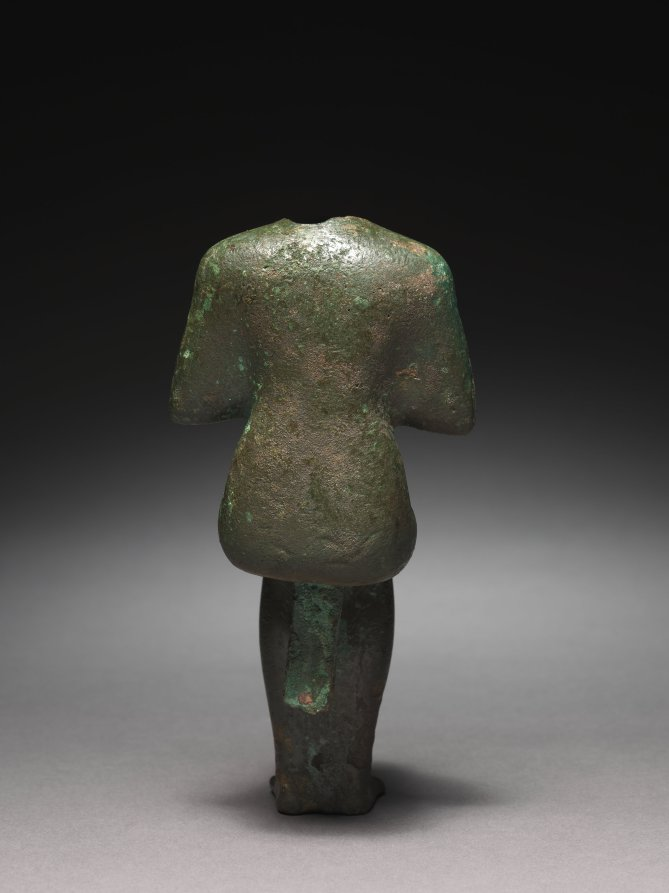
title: Statuette: Seated Mummiform Deity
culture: Egypt, Late period (715–332 BCE), Dynasty 26 or later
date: 664–525 BCE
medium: bronze, solid cast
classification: Sculpture